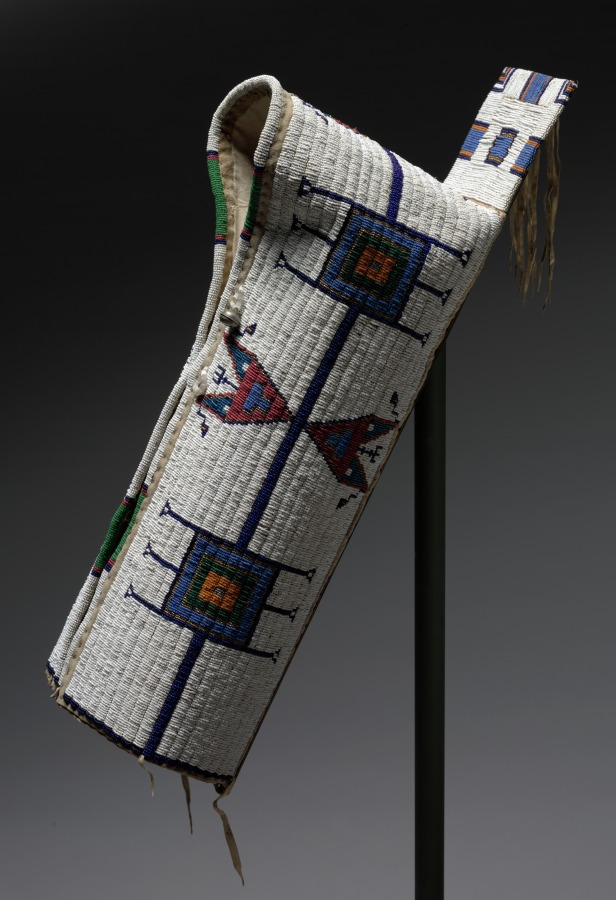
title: Cradle or Baby Carrier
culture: Native North America, Plains, Lakota (Sioux)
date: c. 1900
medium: Native-tanned hide, cotton cloth, glass beads, metal beads, brass bell, sinew thread, cotton thread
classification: Leather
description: Many Plains peoples hold lavishly quilled or beaded cradles in high esteem—they bestow spiritual benefits on the infant and prestige and honor on the family and the maker, usually a female relative. Indeed, today and in the past, creating such a cradle is often regarded as equal to counting coup, the ultimate act of male bravery in which a warrior touches an enemy with a stick known as a coup stick. This cradle was held in the arms; others have wooden frames that can be propped against a support, such as a sofa or a tree, to ease the baby’s socialization into the community.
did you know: In the past, young Plains children spent much of their time in cradles, which remain in occasional use today.